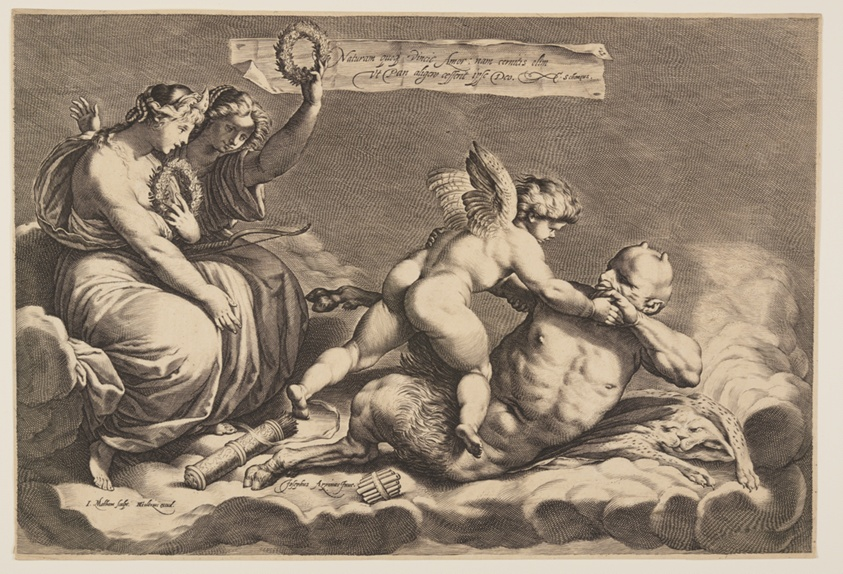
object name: Print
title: Cupid Taming Pan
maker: Jacob Matham (Dutch, 1571–1631); after Giuseppe Cesari, Il Cavaliere d’Arpino (Italian, 1568-1640)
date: c. 1600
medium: Engraving on ivory laid paper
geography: Netherlands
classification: print; paper; prints and drawing; engraving